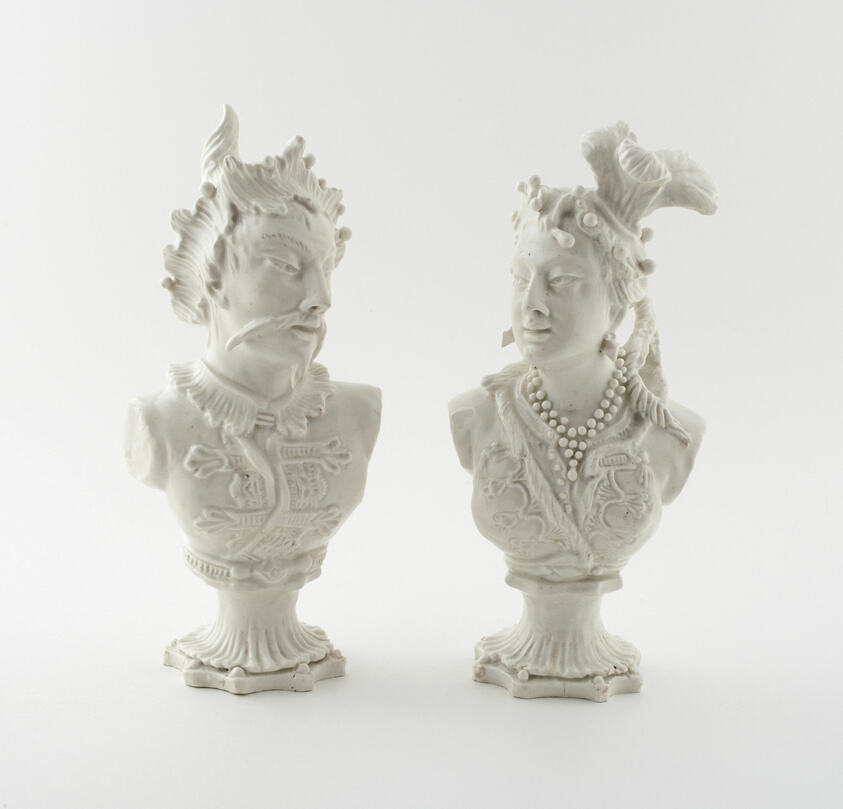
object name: Ceramics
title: Figures of a Mongolian Man and Woman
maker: Bow Porcelain Factory (London, England, 1744–1775)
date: 1750–54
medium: Soft-paste porcelain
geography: England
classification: sculpture; ceramics; porcelain; european decorative arts